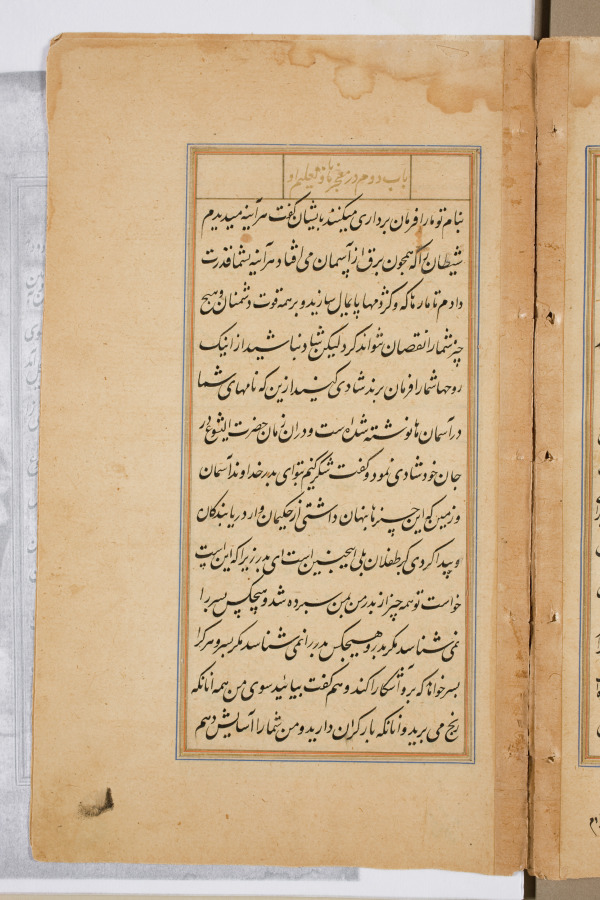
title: Text page from a Mirror of Holiness (Mir’at al-quds) of Father Jerome Xavier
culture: Mughal India, Allahabad, made for Prince Salim (1569–1627)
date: 1602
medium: Ink and gold on paper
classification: Manuscript